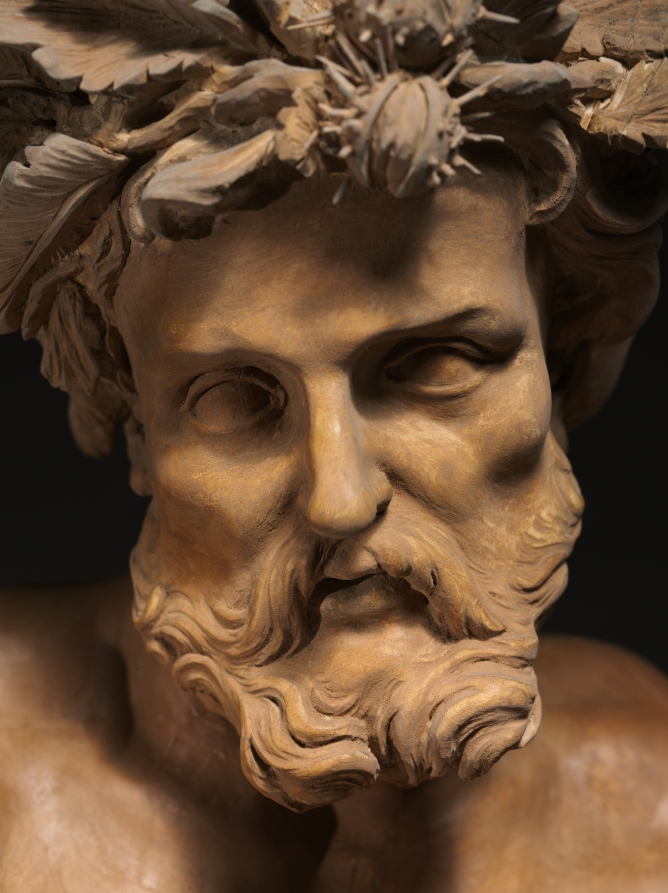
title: Winter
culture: Italy, 17th century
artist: circle of Filippo Parodi (Italian, 1630–1702)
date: c. 1700–1725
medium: wood with traces of gesso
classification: Sculpture